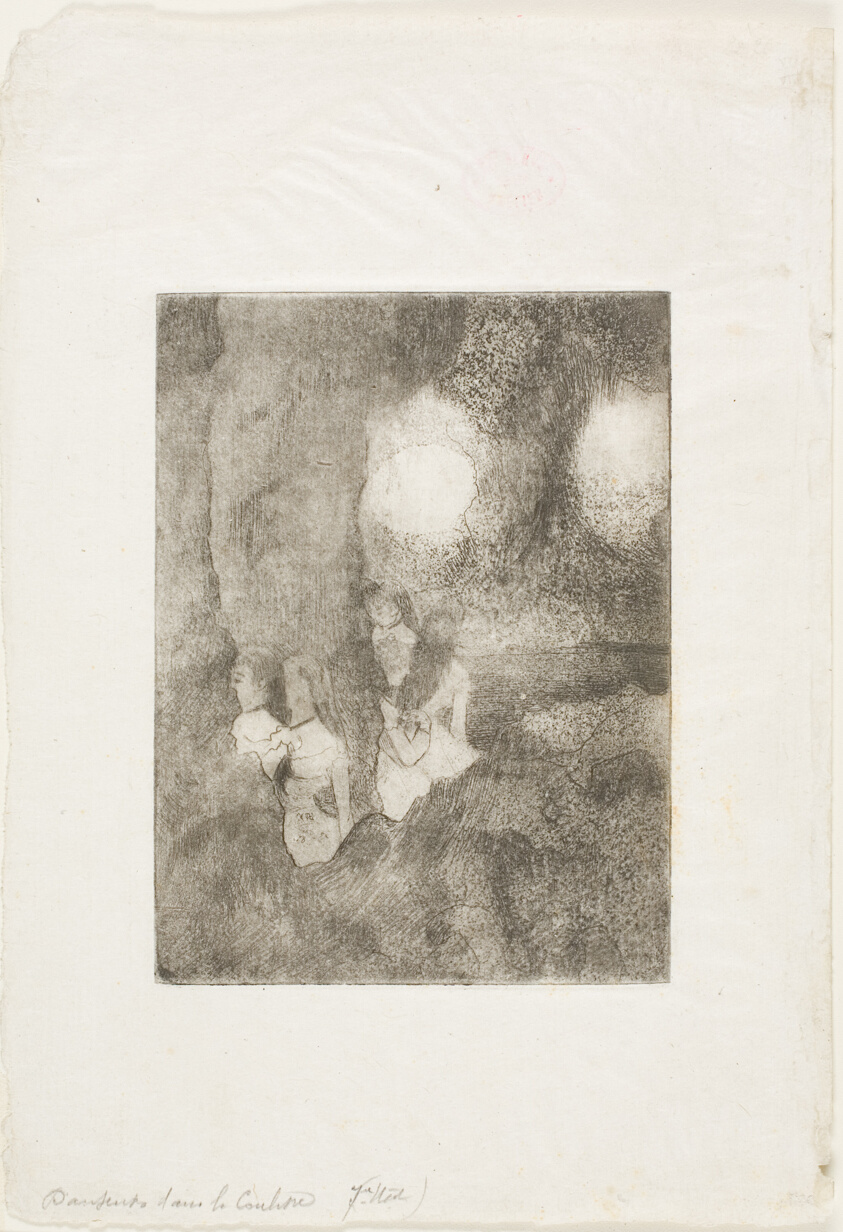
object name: Print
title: Dancers in the Wings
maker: Edgar Degas; French, 1834-1917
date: 1879–80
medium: Etching, aquatint and drypoint on ivory loose chine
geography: France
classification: etching; print; prints and drawing; paper